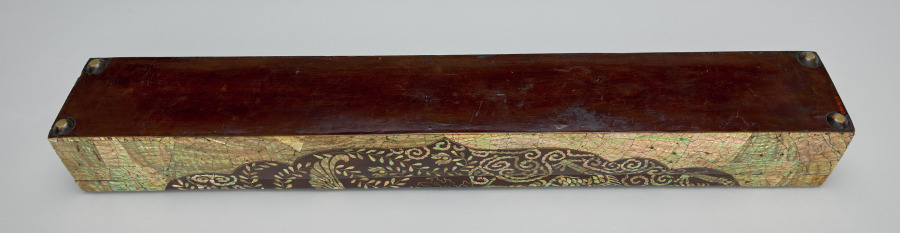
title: Scroll Box with Dragon and Phoenix Design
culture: Korea, Joseon dynasty (1392–1910)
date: 1800s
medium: lacquered wood inlaid with mother-of-pearl and twisted brass and copper wire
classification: Lacquer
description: This large rectangular box was designed for keeping a scroll or an important document. The mother-of-pearl inlaid lacquer rendering of a dragon and phoenix combines texture, color, and shape to produce a dazzling effect. The large and prominent designs of the Joseon-period inlaid lacquer, like on this box, replaced the fine detail and mosaic-like patterns popular in the Goryeo period (918-1392).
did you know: This technique of using the inlays of iridescent mother-of-pearl and abalone shells has been practiced in Korea for over a thousand years,